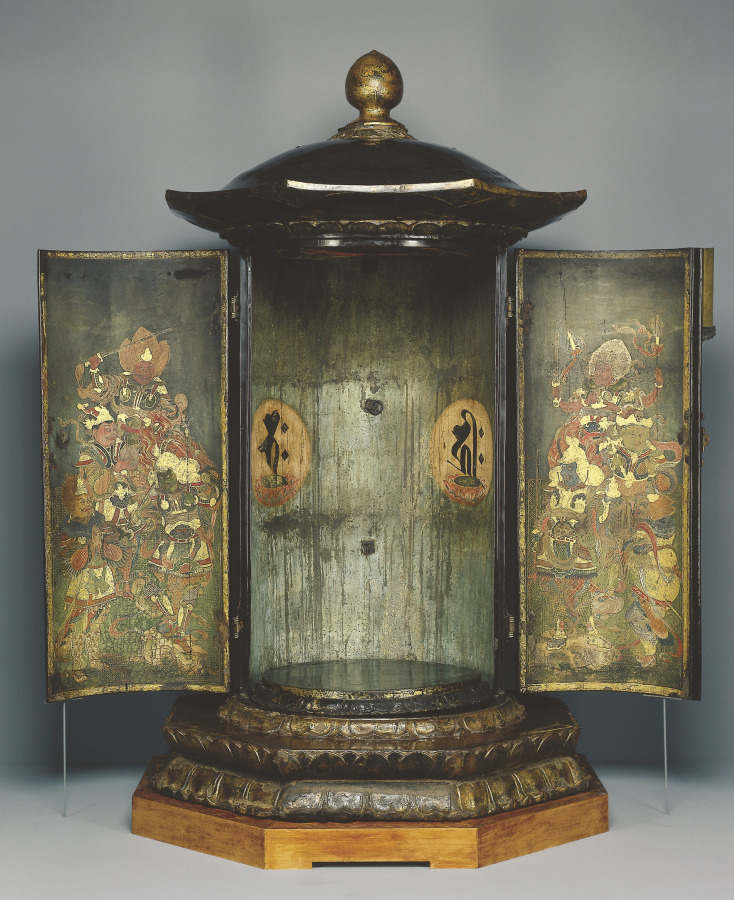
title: Repository for the Great Perfection of Wisdom Sutra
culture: Japan, Heian period (794–1185)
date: late 1100s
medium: lacquered wood with ink, color, gold, cut gold, and metalwork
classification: Lacquer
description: This repository is one of a pair that once contained the scrolls of a religious text called the Great Perfection of Wisdom Sutra. Two discs painted on the back have the sacred syllables representing the Buddha Shakyamuni and the Buddha Amida. Eight of the 16 benevolent but fierce looking deities who protect the text appear on the doors.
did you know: The mate to this object is in the Nara National Museum in Japan.